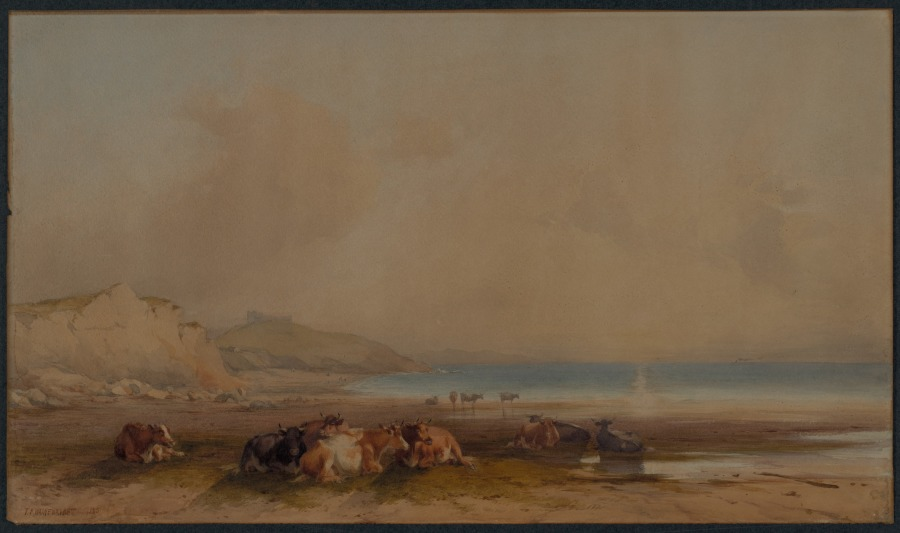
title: Landscape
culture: England, 19th century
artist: Thomas Francis Wainwright (British, 1899)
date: 1885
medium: watercolor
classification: Drawing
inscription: Signed, lower left: "T.F. Wainewright 1885"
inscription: Label, verso, upper center: "Max Williams, N.Y."